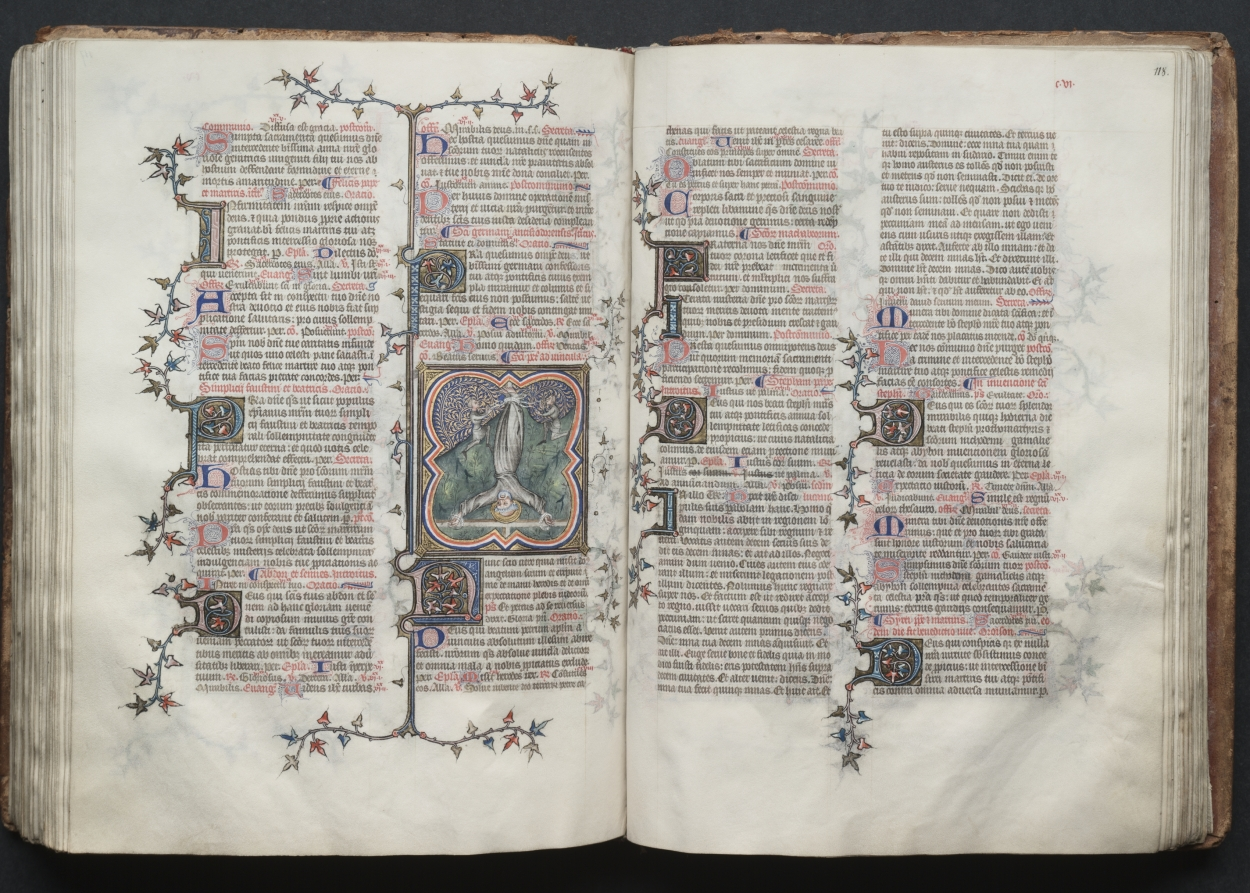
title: The Gotha Missal: Fol. 117v, St. Peter Tied Upside Down to Cross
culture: France, Paris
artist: Master of the Boqueteaux (French)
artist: and Workshop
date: c. 1375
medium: ink, tempera, and gold on vellum; blind-tooled leather binding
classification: Bound Volume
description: The style and quality of this manuscript's decoration is typical of deluxe Parisian books made for aristocratic or royal patrons. Most of the book's decoration appears to be the work of the Master of the Boqueteaux, an artist active at the court of King Charles V (died 1380). His style was apparently shared by a number of book illuminators working in and around Paris. It is very possible that the Gotha Missal belonged to Charles V, but is not provable because the manuscript has no royal portraits and lacks a colophon. Given the book's magnificent decoration, however, it would seem that it was produced for a Valois prince, if not for the king himself. The manuscript receives its name from the German dukes of Gotha, its later owners.